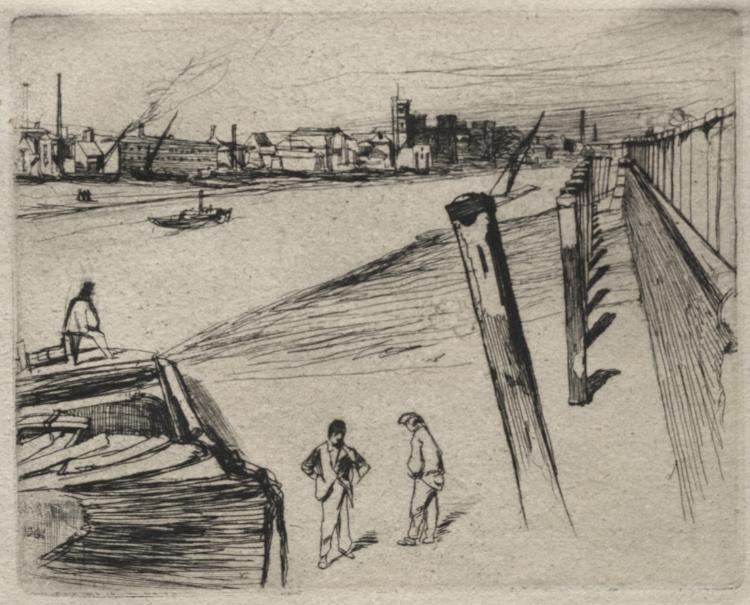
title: Millbank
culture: America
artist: James McNeill Whistler (American, 1834–1903)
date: 1861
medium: etching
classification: Print